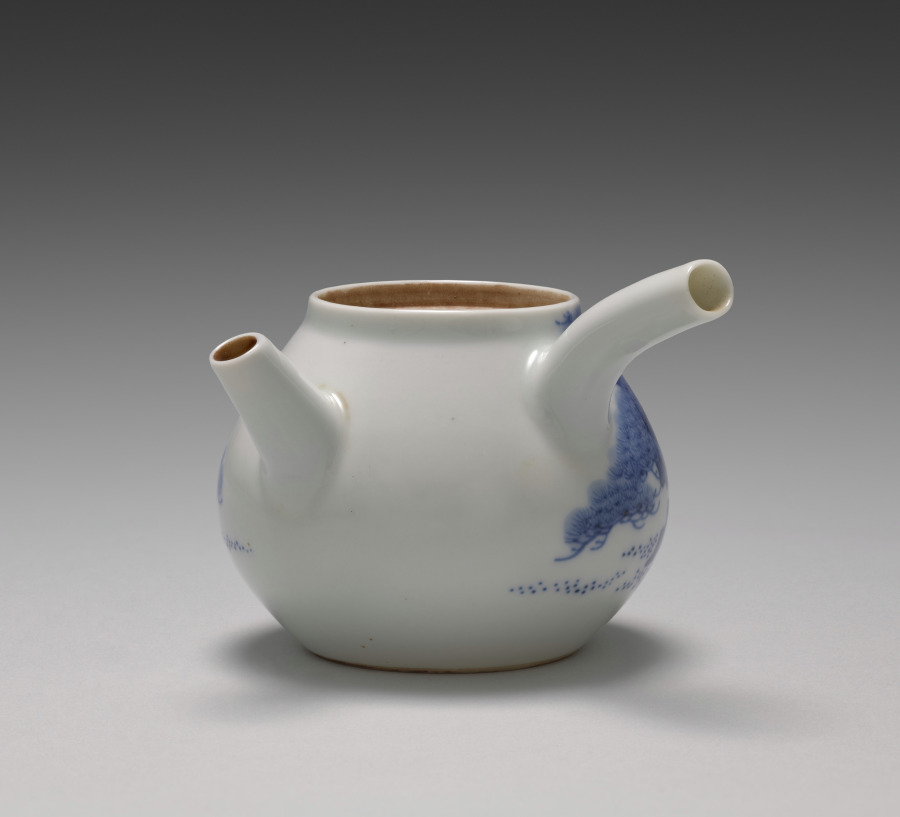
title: Teapot with Pines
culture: Japan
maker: Seifū Yohei III (Japanese, 1851–1914)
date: 1893–1914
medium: Porcelain with underglaze blue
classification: Ceramic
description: Side-handled teapots known as kyūsu and hot water coolers, or yuzamashi, are essential components of sencha tea sets. The teapot is, of course, meant for steeping and serving the tea. Yuzamashi are used to cool boiled water to the ideal temperature for the type of tea to be brewed. This teapot has a pine in underglaze blue on each side. The tip of one of these pines reaches onto the tiny lid, and as with the trees on the Water Cooler with Pines, CMA 2022.163, the trunks are curvy ribbons with little definition. Considering the execution of their designs, one might imagine the pot and cooler to have been part of the same set.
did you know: The teapot's box has a seal of Yamamoto Shōseidō, a shop in Osaka that sold fine ceramics.